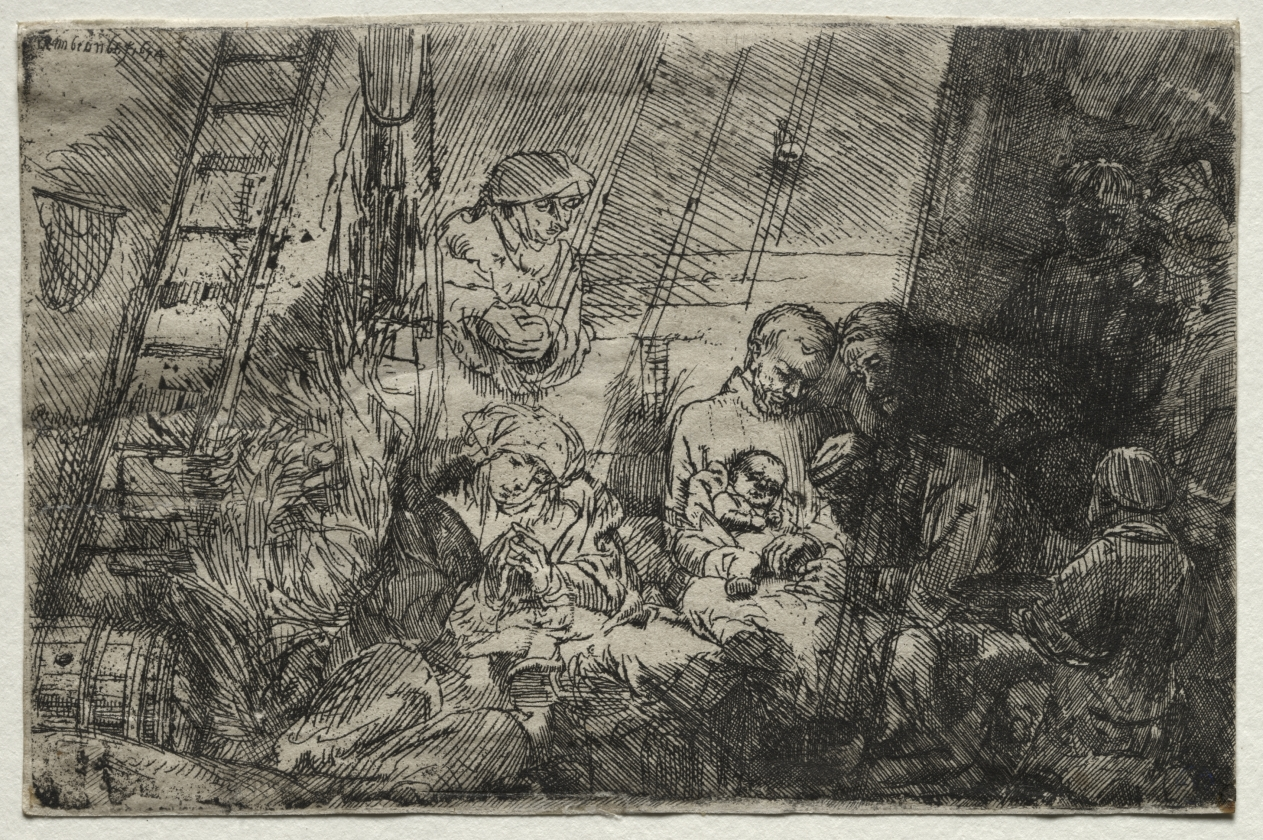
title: The Circumcision In the Stable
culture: Netherlands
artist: Rembrandt van Rijn (Dutch, 1606–1669)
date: 1654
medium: etching with burin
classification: Print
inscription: upper left, in plate: Rembrand["d" reversed]t f 1654 ; center left, in plate: Rembr[illegible] / f 1654 ; VERSO, upper left, in graphite: g/coll ; center, in graphite: B. 47. I ; lower left, in graphite: N 414 E. Geller Z[y?]k